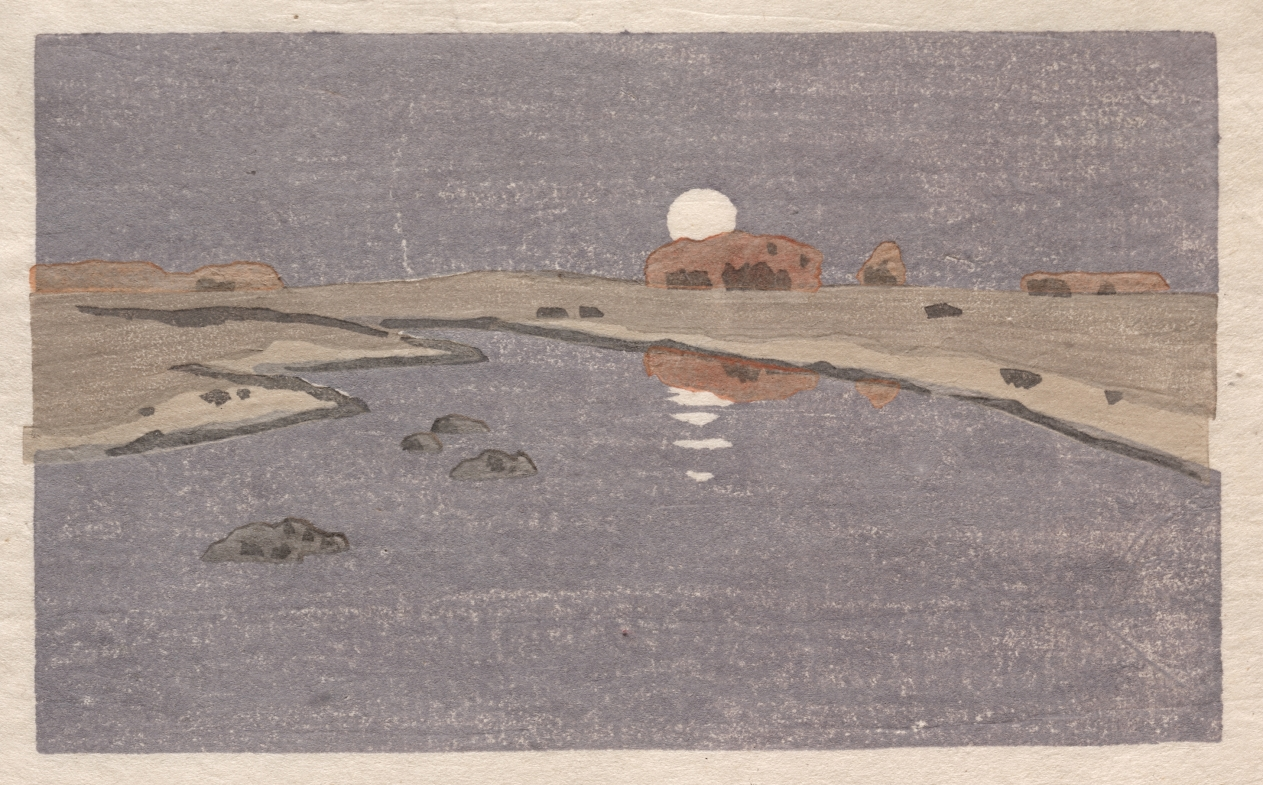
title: Moonrise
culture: America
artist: Arthur Wesley Dow (American, 1857–1922)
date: c. 1915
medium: color woodcut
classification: Print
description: An influential teacher, Dow articulated his artistic beliefs in Composition: A Series of Exercises in Art Structure for the Use of Students and Teachers (1899). His revolutionary approach was rooted in the idea that music was "the key to the other fine arts, since its essence is pure beauty." Dow believed that modern art should aspire to be "visual music."